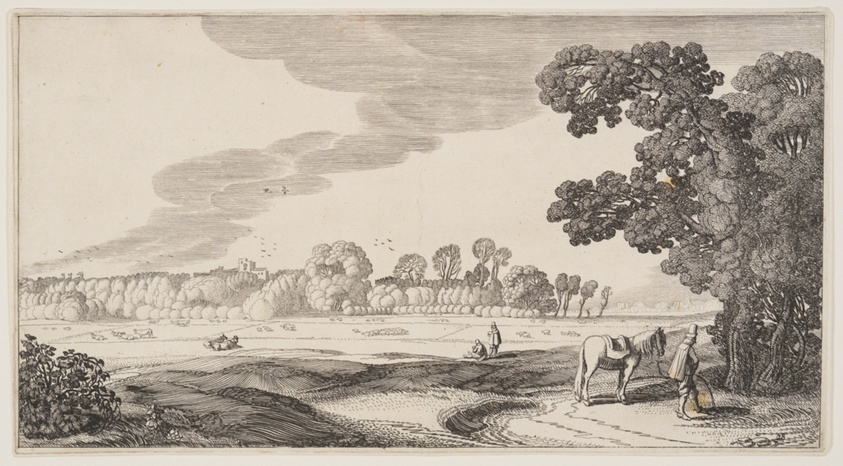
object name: Print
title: View of Pastures, from Landscapes (Playsante Lantschappen)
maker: Attributed to Claes Jansz. Visscher II (Dutch, 1586-1652); after Jan van de Velde II (Dutch, c. 1593-1641)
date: c. 1641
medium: Etching, with engraving, on ivory laid paper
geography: Netherlands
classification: etching; paper; print; prints and drawing